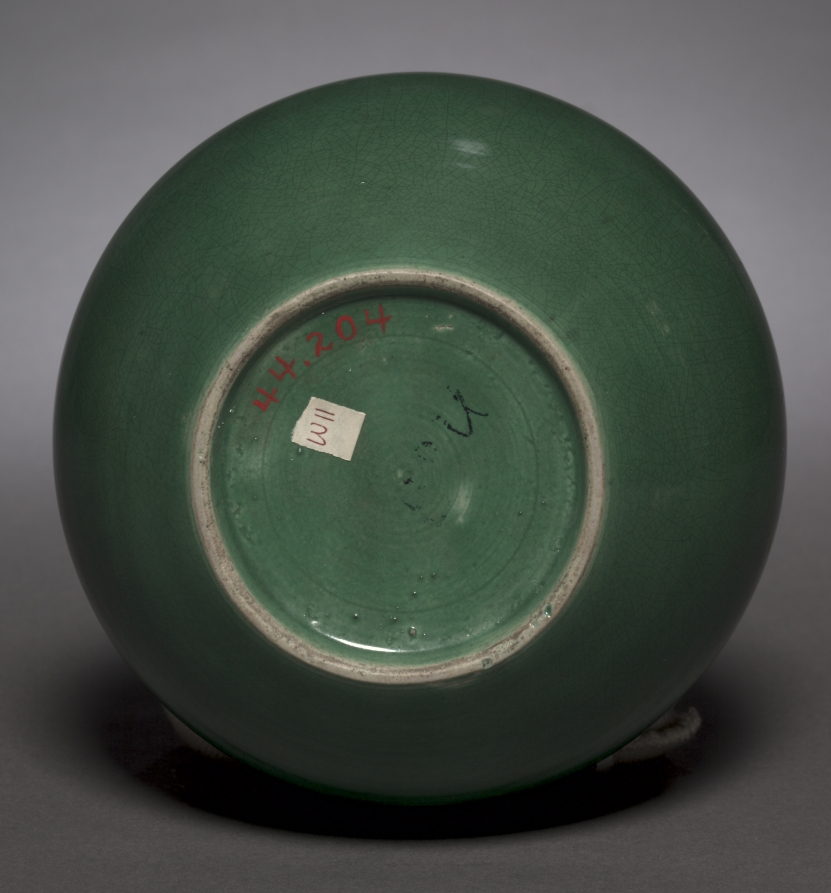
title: Bottle-shaped Vase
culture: China, Qing dynasty (1644–1911), Qianlong reign (1736–95)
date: 1736–95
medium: porcelain with green glaze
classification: Ceramic